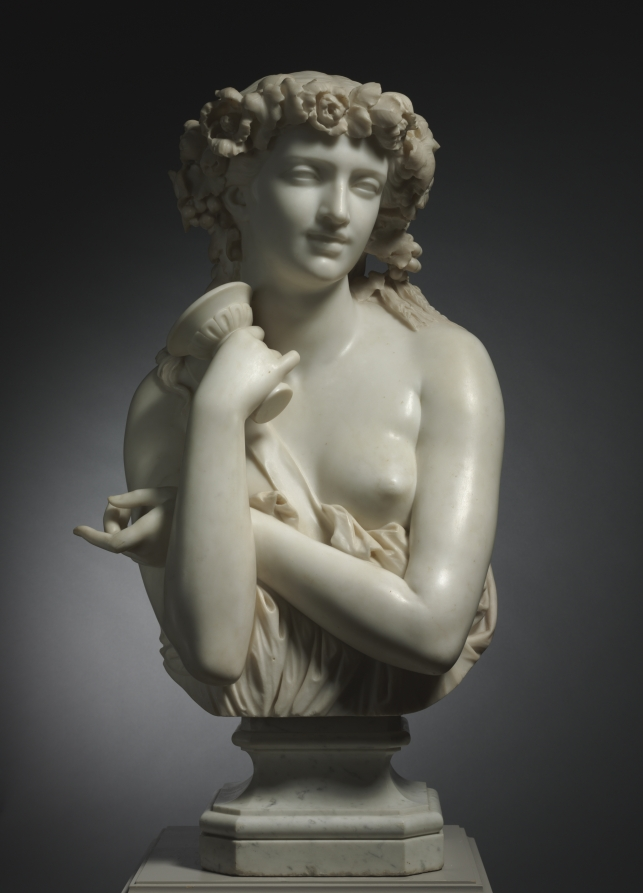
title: Bacchante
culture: France, 19th century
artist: Jean-Baptiste Clésinger (French, 1814–1883)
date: 1863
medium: marble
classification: Sculpture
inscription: signed below, on back of bust: J. Clésinger / Rome / 1836.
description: The French sculptor Auguste Clésinger spent much of his life in Rome, where this bust was created in 1863. He is particularly noted for the creation of sensual subjects in marble, such as this obviously inebriated Bacchante, a female companion of Bacchus, the Roman god of wine.